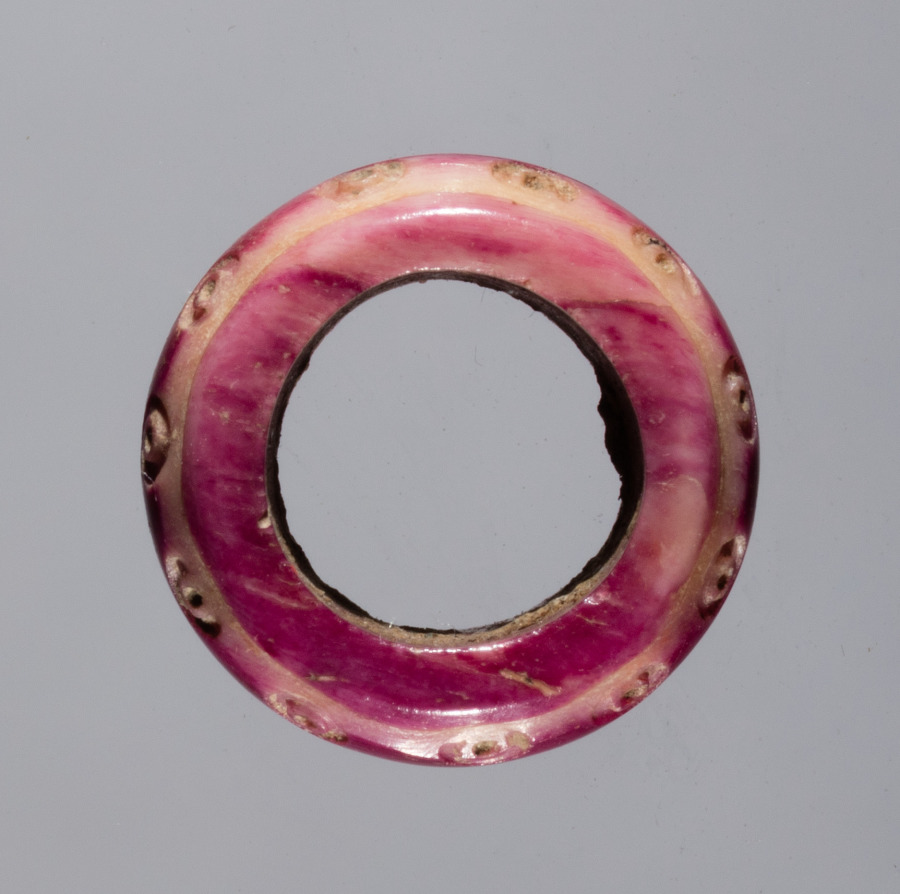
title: Spindle Whorl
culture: Iran, early Islamic period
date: 700s - 900s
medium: bone, incised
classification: Spindle Whorl